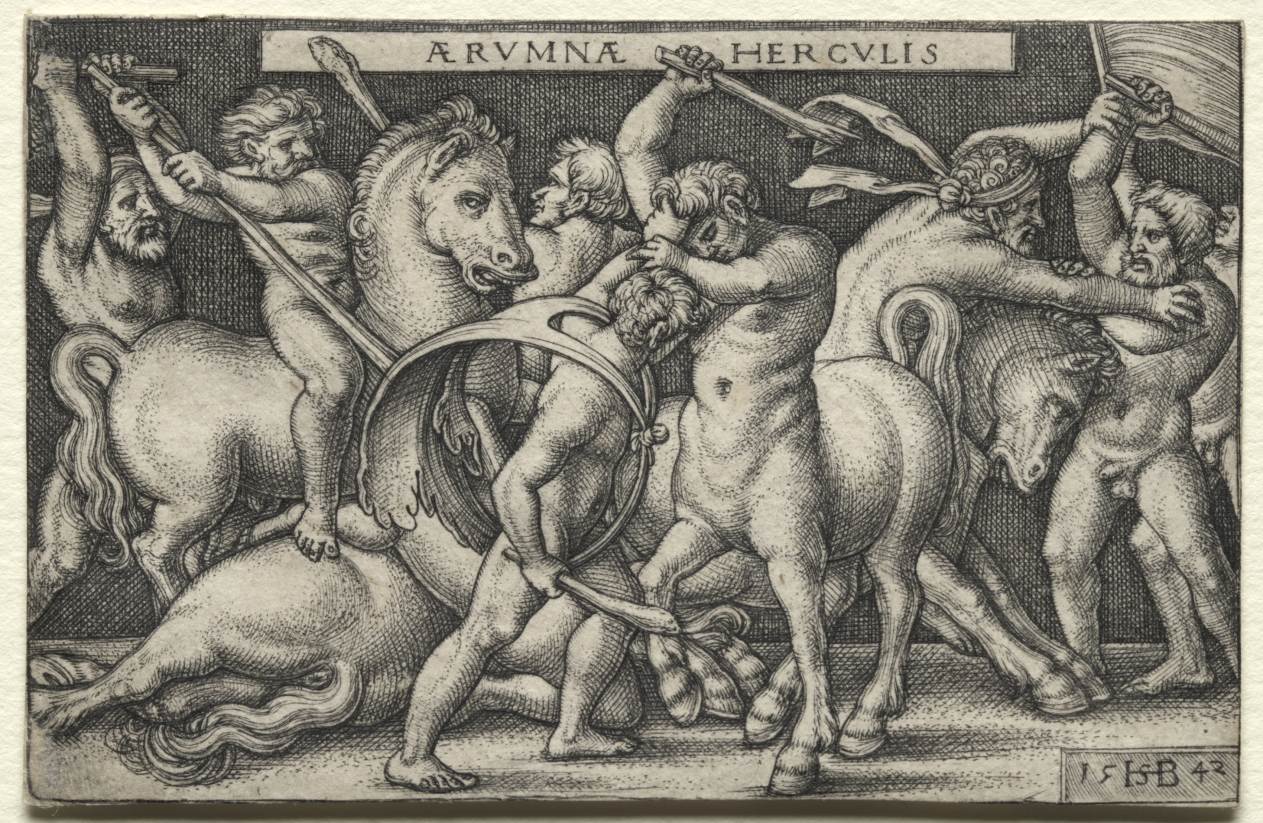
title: The Labors of Hercules: Hercules Defeating the Centaurs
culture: Germany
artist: Hans Sebald Beham (German, 1500–1550)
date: 1542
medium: engraving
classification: Print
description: Beham was one of several German printmakers referred to today as the “Little Masters.” They established their artistic prowess by engraving remarkably small prints, appealing to collectors fascinated with miniature objects and curiosities. Here, Beham has packed 12 larger-than-life stories of the mighty Hercules into tiny prints. The series includes three of the 12 labors Hercules performed as penance for slaying his children in a fit of madness: Strangling the Nemean Lion, Killing the Lernean Hydra, and Dragging Cerberus from the Underworld. The other scenes depict tales from his life and the events preceding his death. The son of Jupiter and the mortal Alcmena, Hercules was both man and god. His saga of moral and physical trials made him one of the most popular classical heroes in Renaissance art.